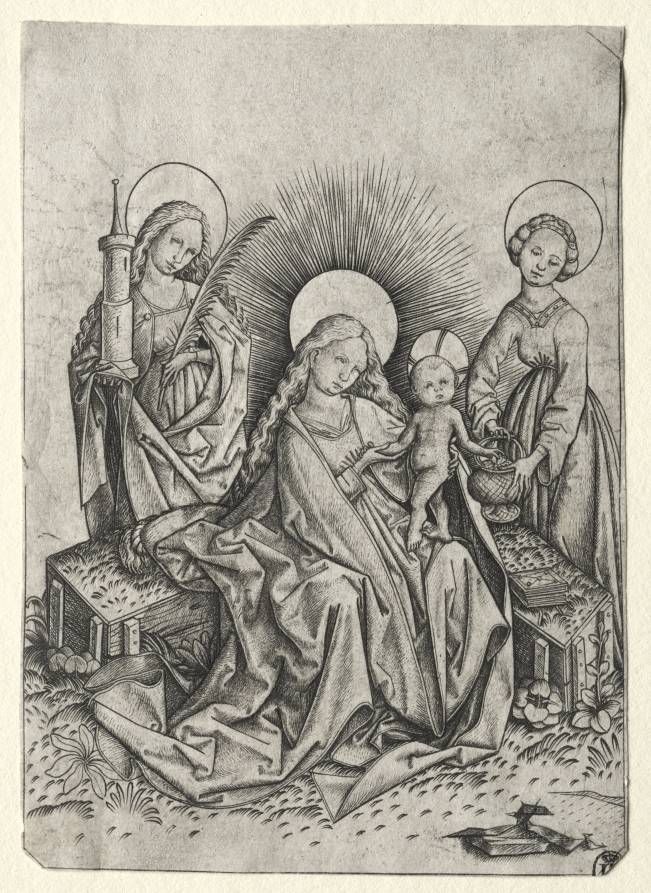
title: Madonna and Child in a Garden between St. Barbara and st. Dorothy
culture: Germany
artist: Master ES (German, active 1450–67)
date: 1450–67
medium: engraving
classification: Print